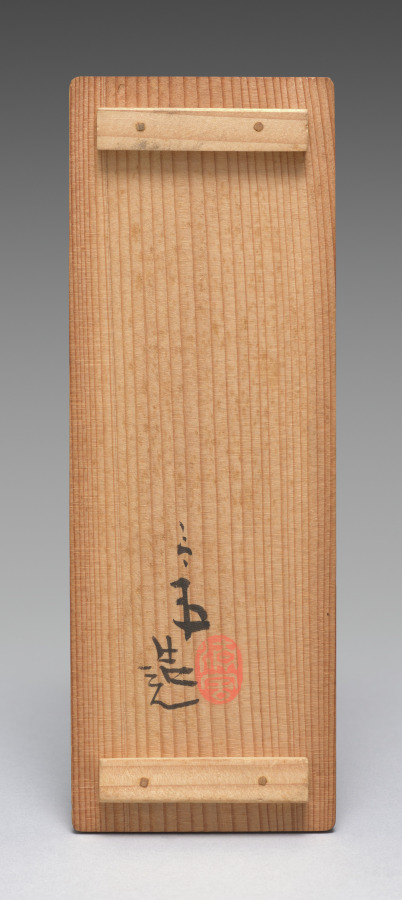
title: Sake Cups with Dragons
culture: Japan, Meiji period (1868–1912)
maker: Seifū Yohei III (Japanese, 1851–1914)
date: 1893–1914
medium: Set of six sake cups; porcelain with underglaze blue and iron oxide rims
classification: Ceramic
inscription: 大日本清風造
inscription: 清風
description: Each of these sake cups pictures two backward-looking dragons. The highly stylized creatures resemble jade carvings.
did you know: Seifū Yohei III was inspired by the Chinese mythical animals that were common on porcelain objects made at Jingdezhen in China during the Ming dynasty (1368–1644) and then exported around the world.